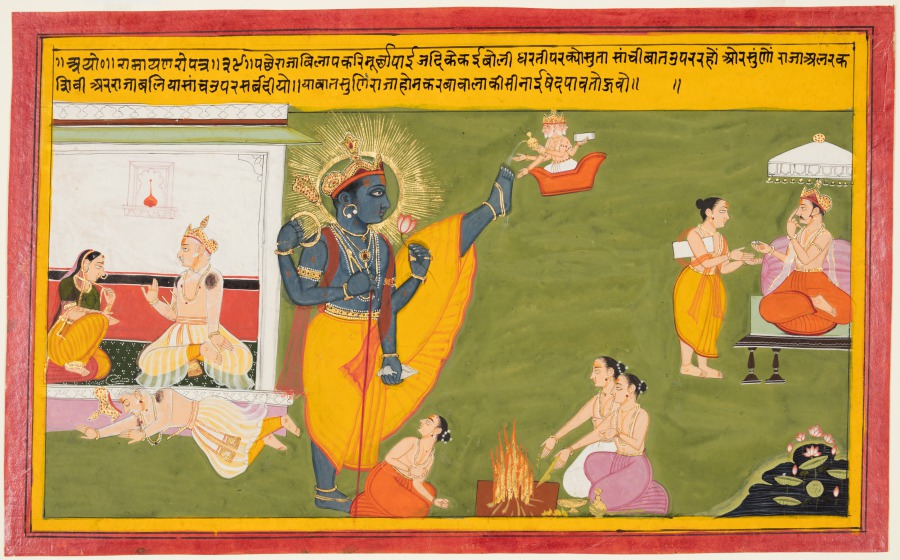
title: Queen Kaikeyi reminds King Dasharatha about the sacrifices of King Bali and King Shivi, folio 39 from the Ayodhya Kanda (Book of Ayodhya) of a Ramayana (Rama's Journey)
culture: Northwestern India, Rajasthan, Rajput Kingdom of Mewar, Court of Amar Singh II (reigned 1698–1710)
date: c. 1710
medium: gum tempera, ink, and gold on paper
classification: Painting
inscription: [[recto]] ayo[dhyā kāṃda]. ṛāmāyana ro patra. 39. pache rājā bilāpa kari mūrchā pai jadi kekaī bolī dhartī para kyo sutā saṃcī bāta upara rahoṃ or suṃnoṃ rājā alaraka śivī ara rājā bali yā sāmca upara sarba dīyo yā bāta suni rājā homa kara bāvālā kīsī nāī khed pāctouva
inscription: [[verso]] ayodhaya, 39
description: A large portion of this composition is dominated by the episode of Vishnu’s manifestation as Trivikrama in Raja Bali’s sacrifice. Vishnu stands monumentally with his one foot on the ground and the other foot reaching to heaven where Brahma washes Vishnu’s foot with Ganges water in devotion. Raja Bali is shown giving the sacrifice to Vamana, the brahmin incarnation of Vishnu.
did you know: The scenes outside the room illustrate and expand further on what the queen, at left, is saying.